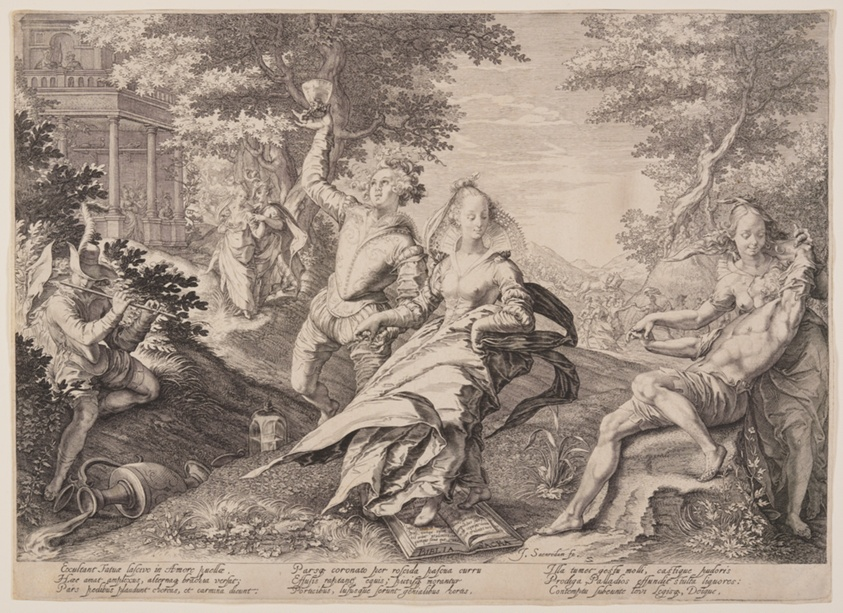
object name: Print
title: Foolish Virgins Revelling, from Parable of the Wise and Foolish Virgins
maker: Jan Saenredam (Dutch, 1565–1607)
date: 1606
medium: Engraving on ivory laid paper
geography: Netherlands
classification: engraving; paper; print; prints and drawing